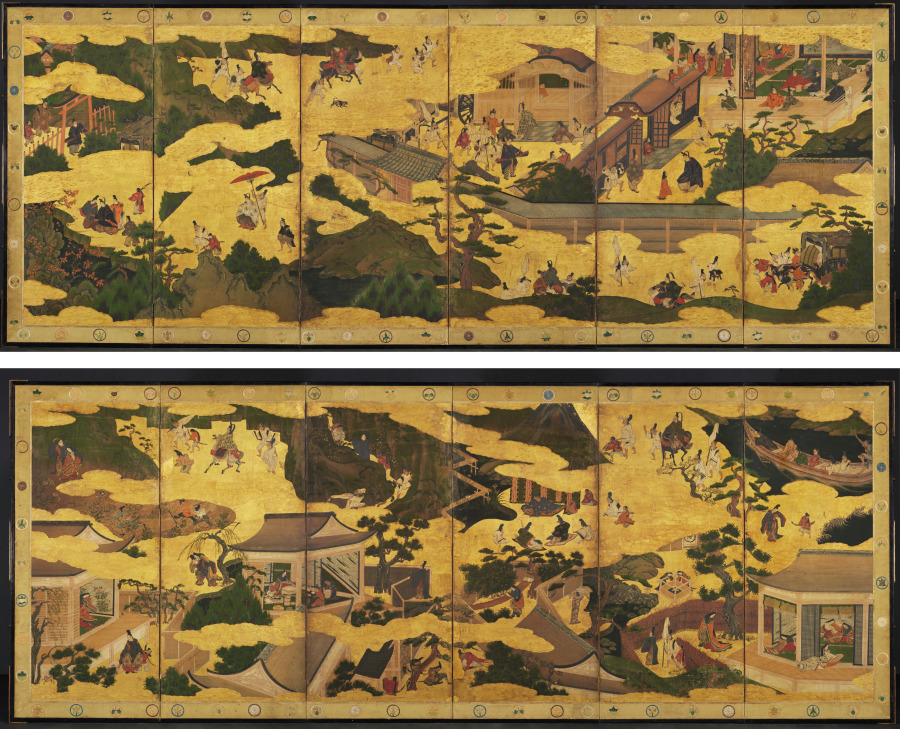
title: Scenes from the Tales of Ise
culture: Japan, Edo period (1615–1868)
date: mid-1600s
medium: Pair of six-panel folding screens; ink, color, and gold on gilded paper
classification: Painting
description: While the 11th century Tale of Genji is universally regarded as Japan's literary masterpiece, the source for visual imagery in Japanese culture is rivaled by another literary classic, the Tales of Ise. A 10th century anthology of poems interspersed with commentary, the Ise portrays the emotional and geographical journey of a courtier from the capital (Kyoto) into the countryside and beyond. The poems describe features of the natural, untamed terrain, linking them to the rather melancholy state of the traveler. Since the Tales of Ise was—and remains today—well read by educated Japanese, a person viewing these folding screens would immediately recognize its subject, organized as a series of discrete scenes read from right to left. Neither a signature nor a seal identifies the artist, but judging from related paintings, the work can be ascribed to an artist working in Kyoto during the first quarter of the 17th century in the manner of the painter Iwasa Matabei (1578–1650). This type of historical narrative composition became quite popular around 1600 among patrons favoring a distinctly Japanese style of painting which employed rich mineral pigments and a liberal use of gold.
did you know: Scenes appear amid golden clouds augmented by raised designs formed of a pigment made from crushed shells (gofun). The technique is called moriage, literally “mounding” the pigment.